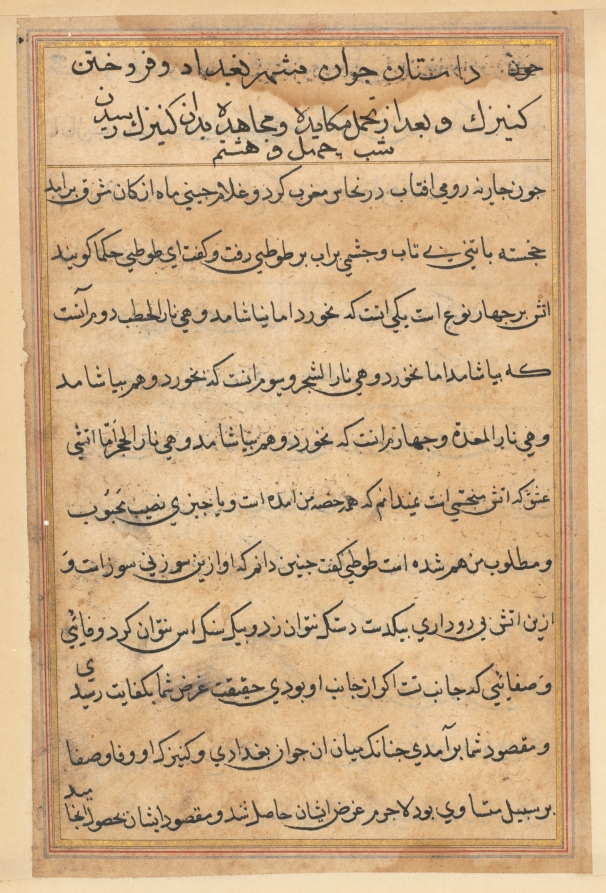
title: Page from Tales of a Parrot (Tuti-nama): text page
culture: Mughal India, court of Akbar (reigned 1556–1605)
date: c. 1560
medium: gum tempera, ink, and gold on paper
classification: Painting